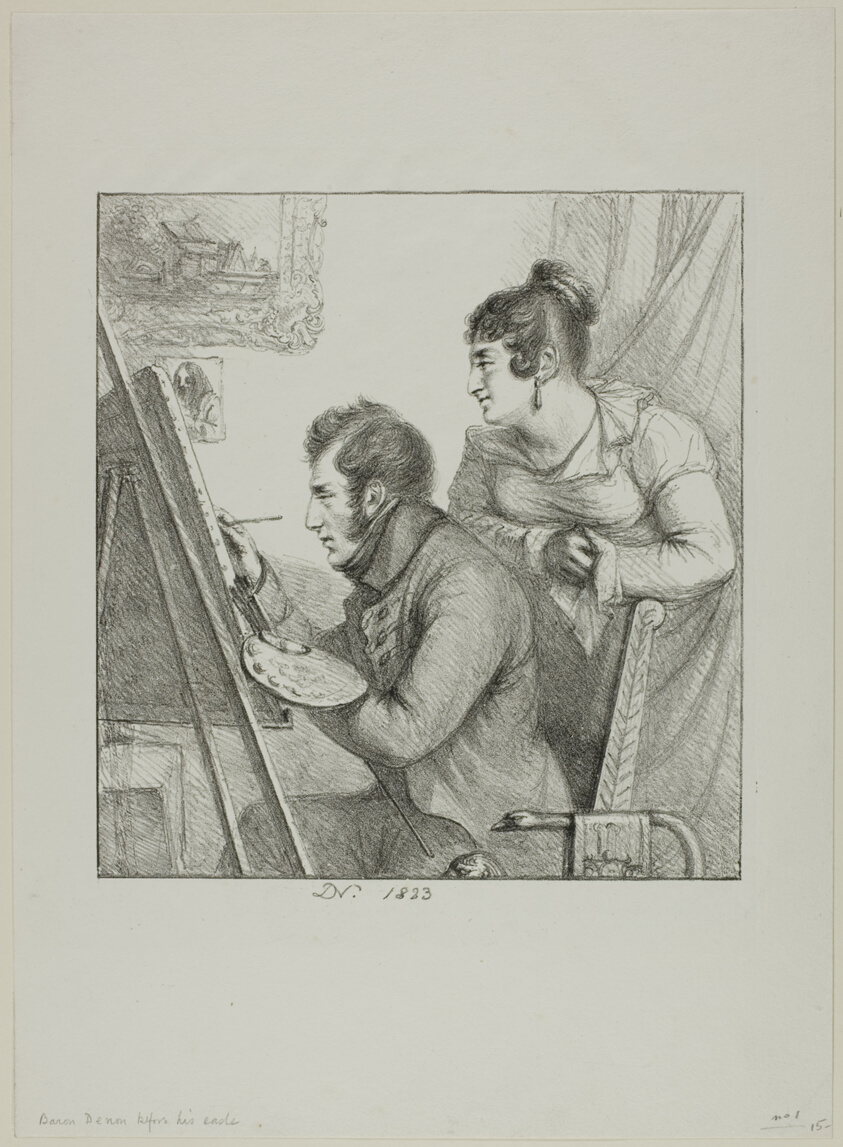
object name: Print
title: Baron Denon before his Easel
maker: Dominique-Vivant Denon (French, 1747-1825)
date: 1823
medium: Lithograph in black on white wove paper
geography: France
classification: lithograph; print; prints and drawing